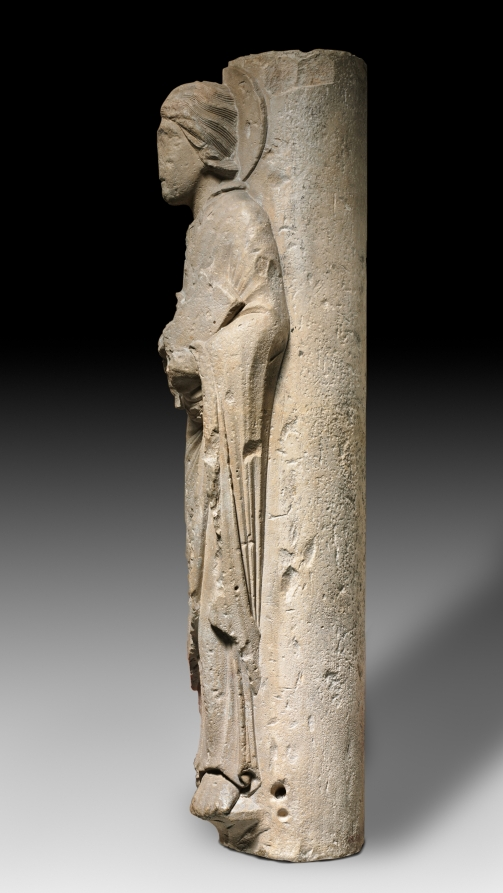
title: Columnar Figure of an Apostle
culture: France, Champagne, Châlons-sur-Marne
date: c. 1180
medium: limestone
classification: Sculpture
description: This figure of an apostle, probably Saint John the Evangelist, attached to its supporting column, came originally from the cloister of the Church of Notre-Dame-en-Vaux at Châlons-sur-Marne. A cloister was a covered walkway usually around all four sides of a square area of grass (the "cloister garth"). The seclusion of the cloister was the exclusive domain of the monks or clergy and off-limits to others. Here, the monks were able to pray, study, meditate, and exercise in privacy and solitude. This figure illustrates the transition in style from Romanesque to Gothic taking place in ecclesiastical buildings across northern France during the late 1100s.